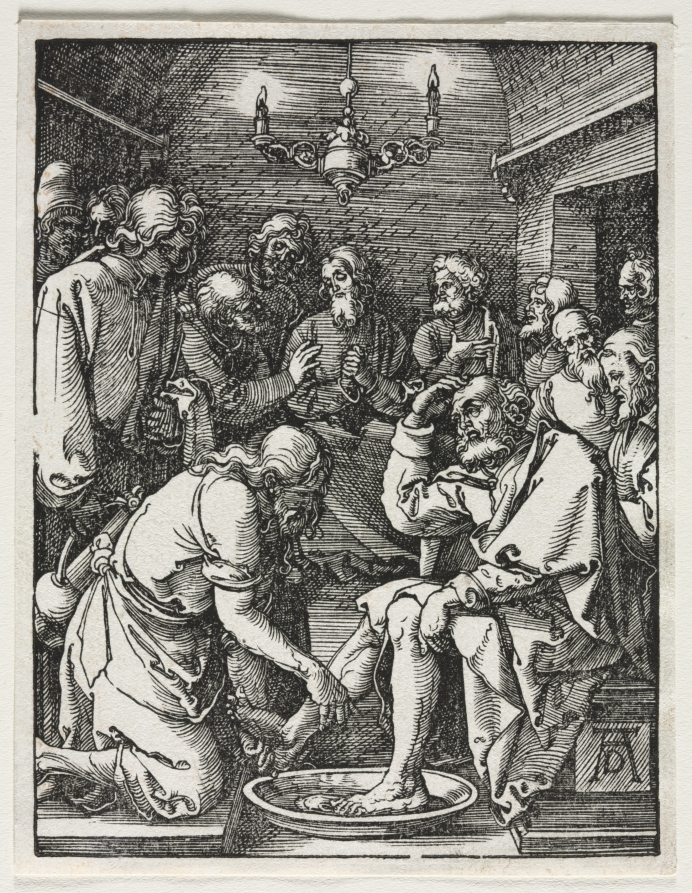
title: The Small Passion: Christ Washing St. Peter's Feet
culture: Germany, late 15th-early 16th century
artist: Albrecht Dürer (German, 1471–1528)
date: c. 1509–10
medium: woodcut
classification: Print